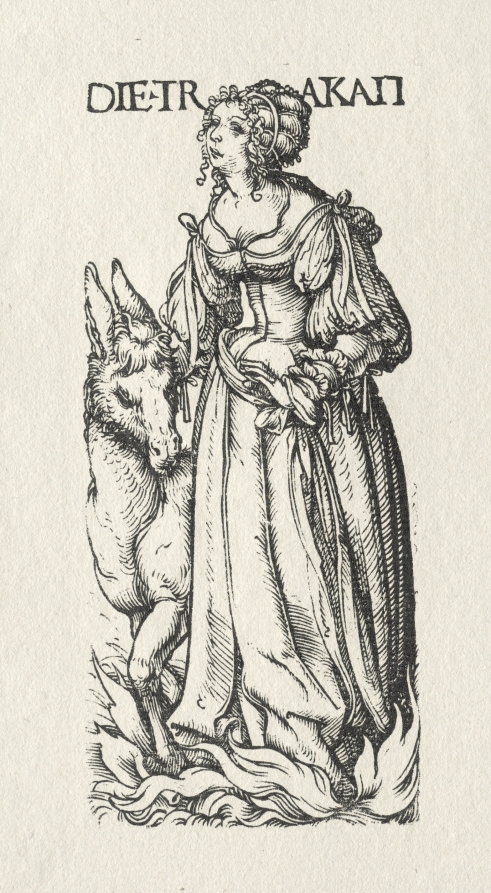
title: The Seven Vices: Sloth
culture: Germany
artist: Hans Burgkmair (German, 1473–1531)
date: c. 1510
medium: woodcut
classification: Print